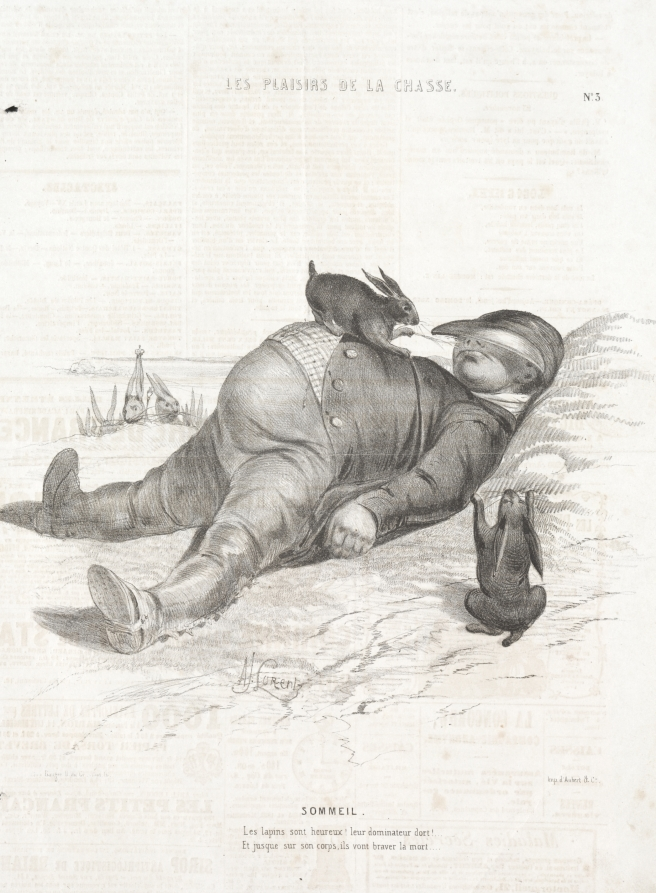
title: Les Plaisirs de la chasse: Sommeil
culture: France, 19th century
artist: Alade Joseph Lorentz (French, 1813-after 1858)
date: 1842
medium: lithograph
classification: Print